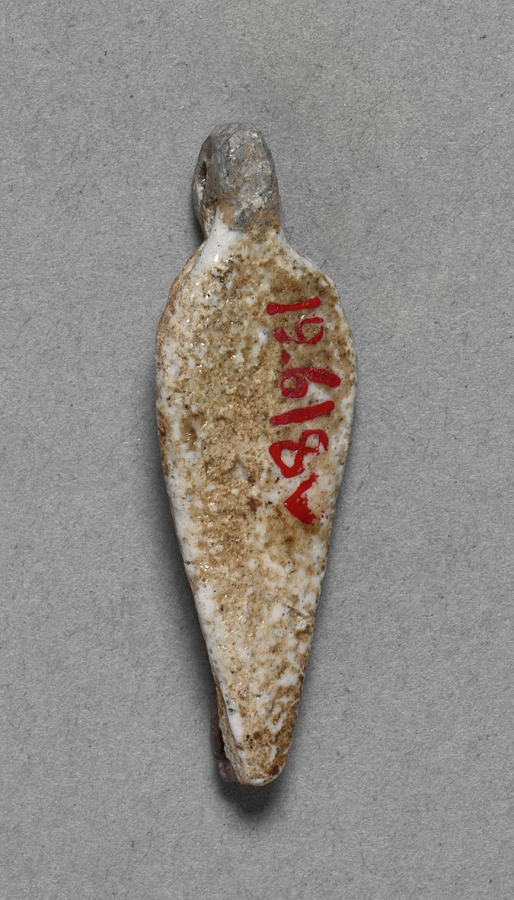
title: Petal-Shaped Bead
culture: Egypt, New Kingdom (1540–1069 BCE), Dynasty 18, reign of Amenhotep III (1390–1352 BCE)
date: c. 1391–1353 BCE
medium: faience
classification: Jewelry